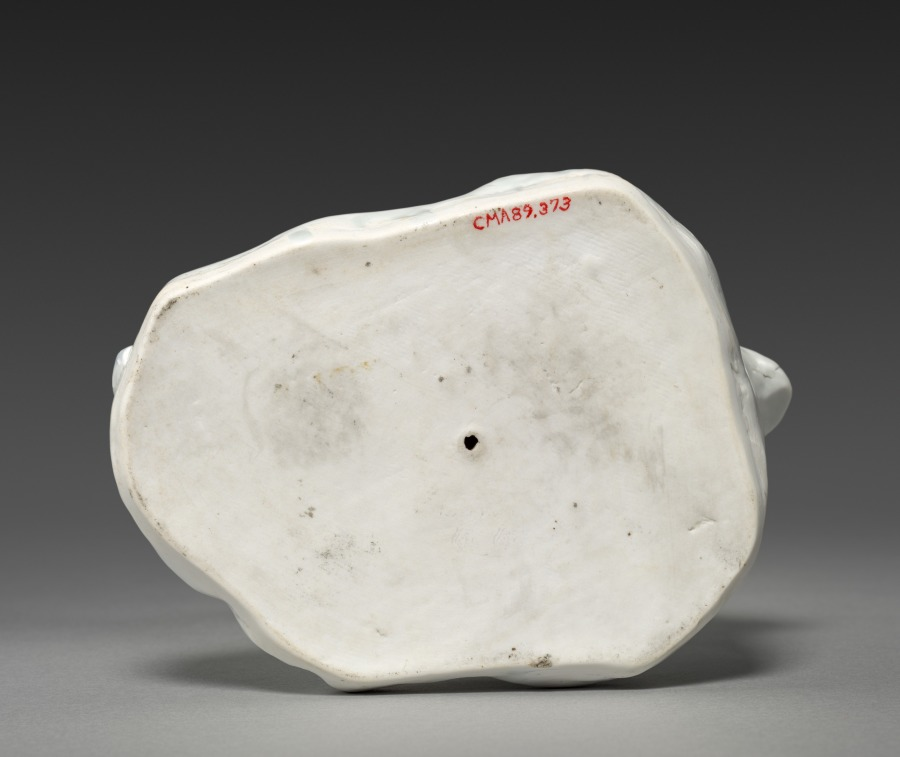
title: Tortoises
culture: Japan, Edo period (1615–1868)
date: early to mid-1800s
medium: porcelain, molded and carved, with underglaze blue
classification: Ceramic